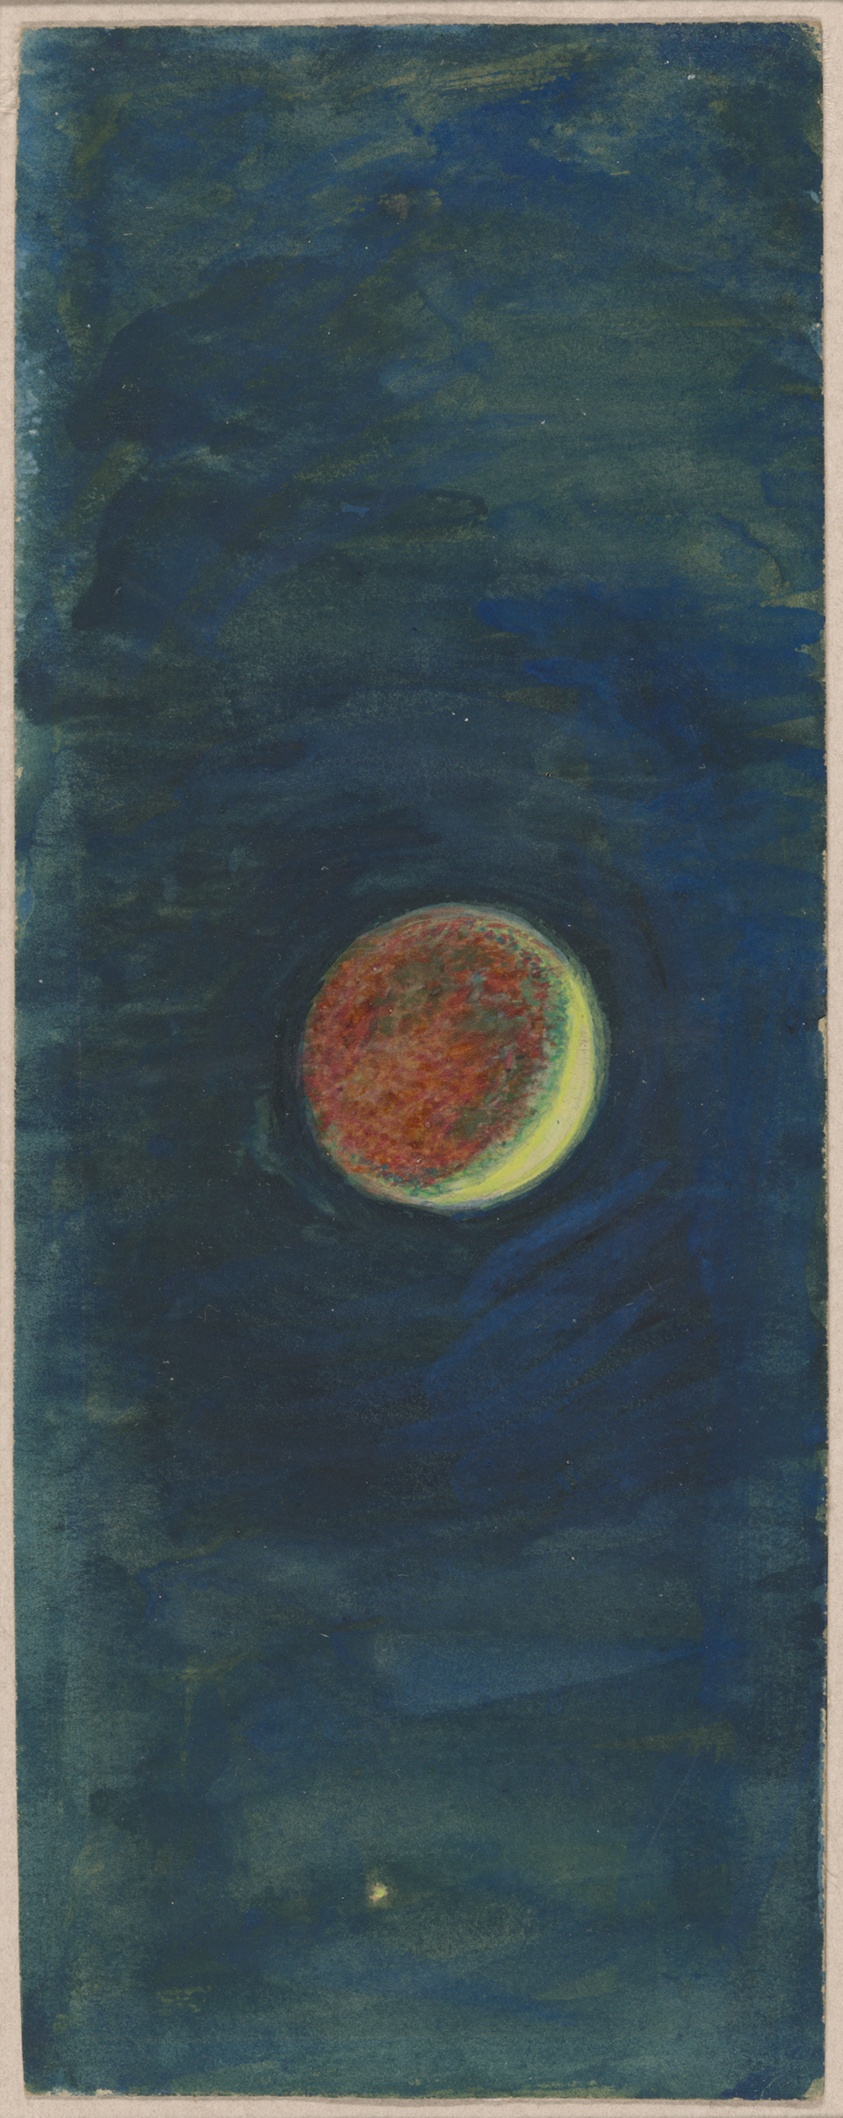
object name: Drawing and Watercolor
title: Study of the Crescent Moon in "The Ship"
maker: William Holman Hunt (English, 1827-1910)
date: c. 1875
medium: Opaque watercolor on cream wove paper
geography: England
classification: prints and drawing; drawing; gouache; paper